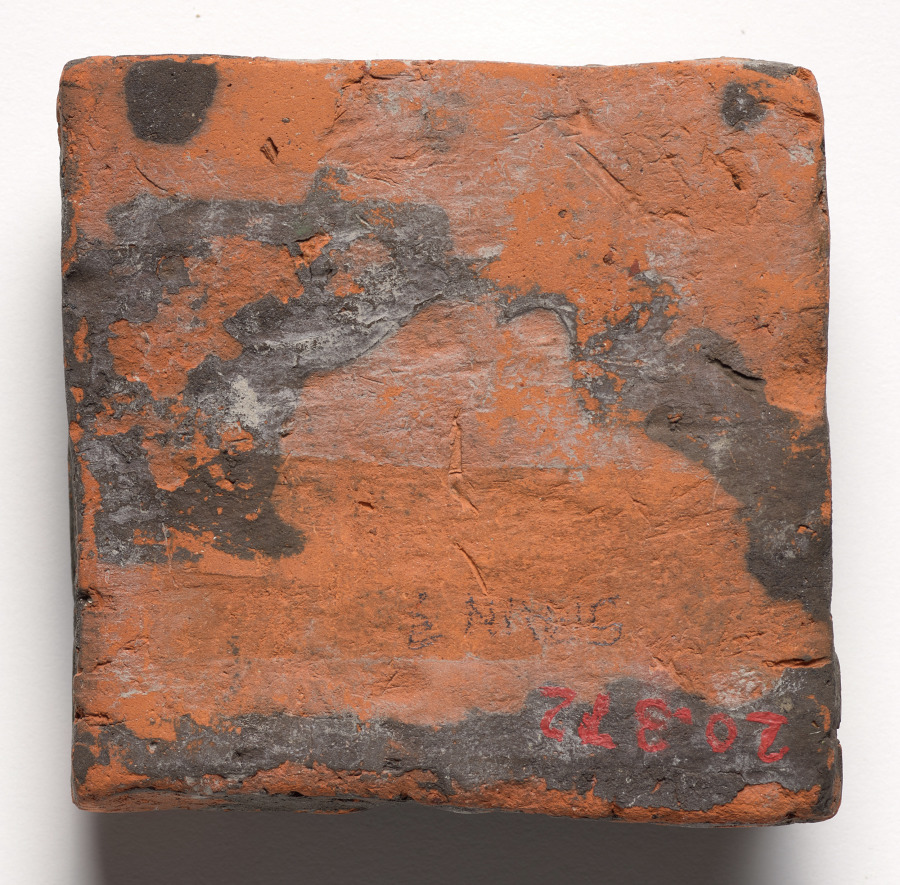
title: Tile- Hippogriff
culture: America, Pennsylvania, Doylestown, Early 20th century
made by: Moravian Pottery and Tile Works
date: before 1920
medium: unglazed terracotta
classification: Ceramic